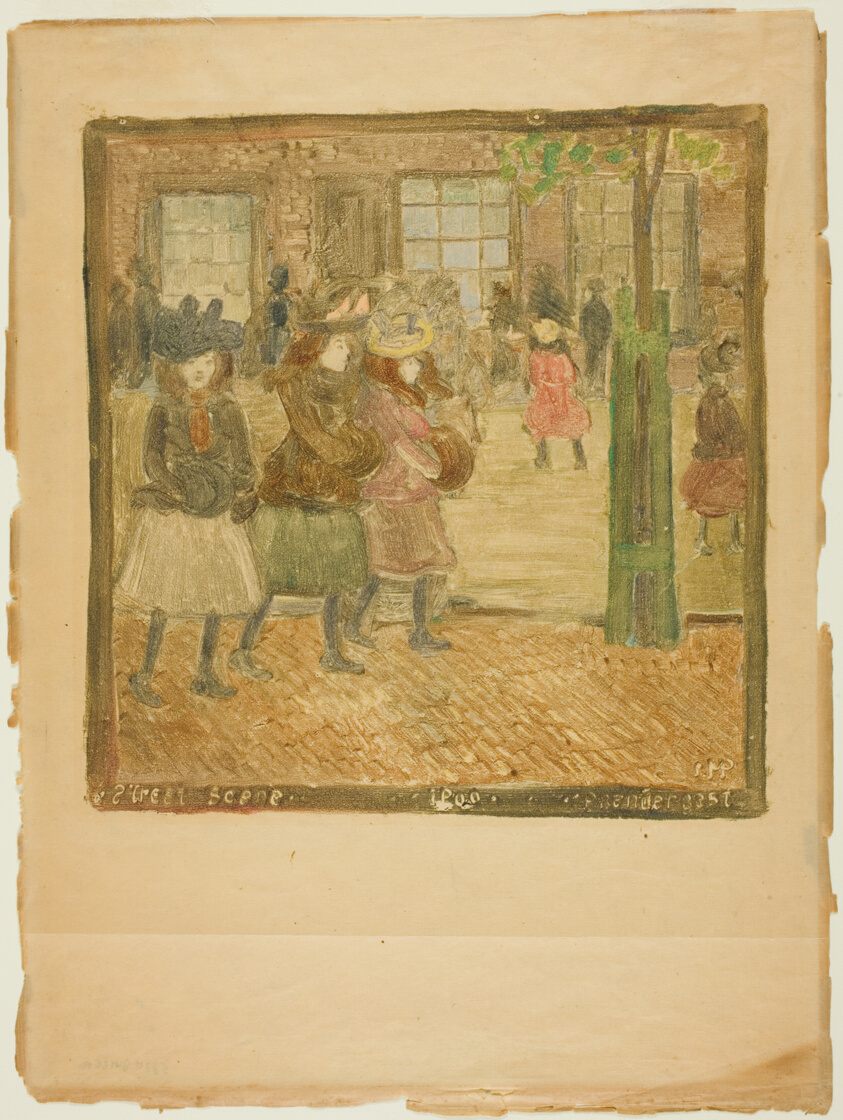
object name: Print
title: Street Scene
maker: Maurice Prendergast; American, 1858-1924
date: c. 1891–94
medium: Color monotype on paper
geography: United States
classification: monotype; print; prints and drawing